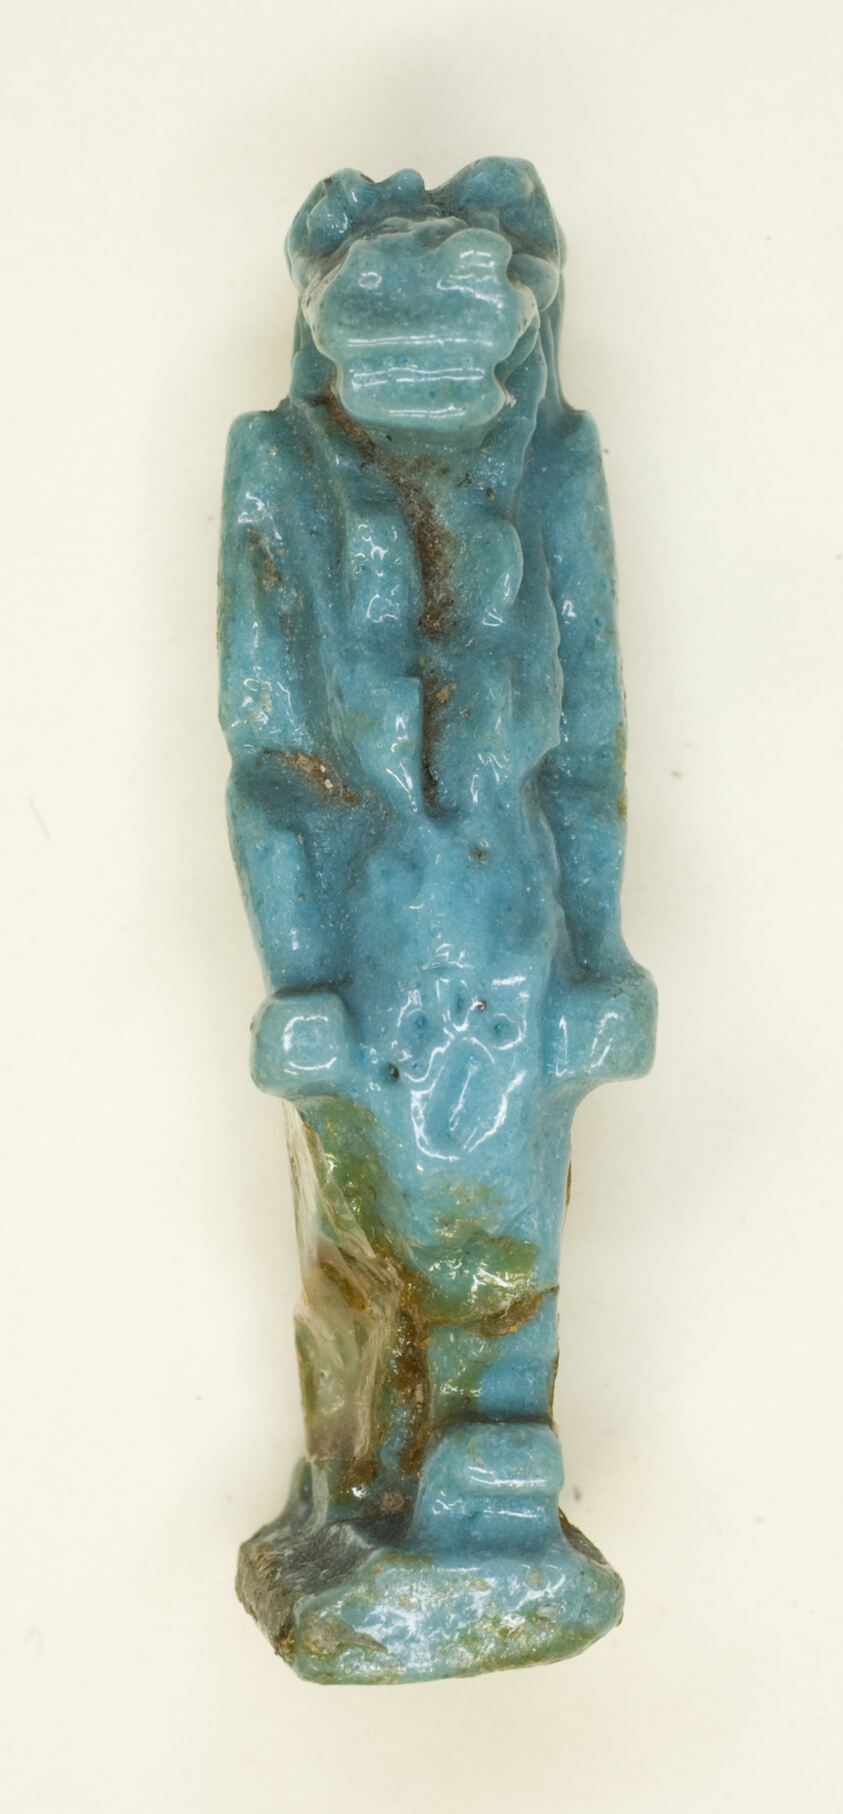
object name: Costume and Accessories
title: Amulet of the Goddess Tawaret (Toeris)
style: third intermediate period, egyptian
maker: Egyptian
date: Third Intermediate Period, Dynasty 21–25 (1070–656 BCE)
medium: Faience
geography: Egypt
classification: amulet; ceramics; jewelry; ancient art; costume; faïence (composite material)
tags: goddesses